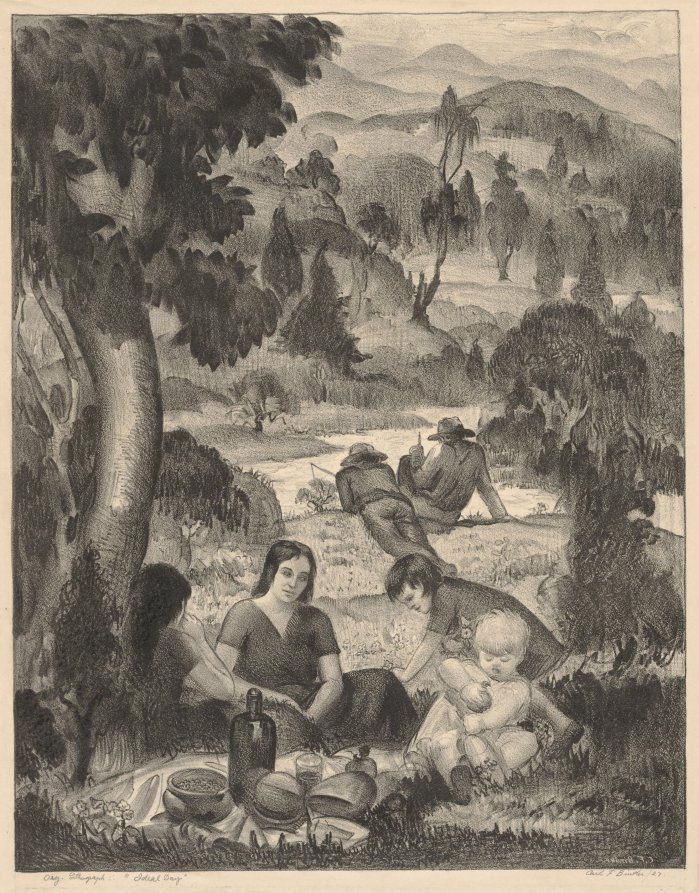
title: Ideal Day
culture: America, Ohio, Cleveland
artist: Carl F. Binder (American, 1887–1968)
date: 1927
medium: lithograph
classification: Print